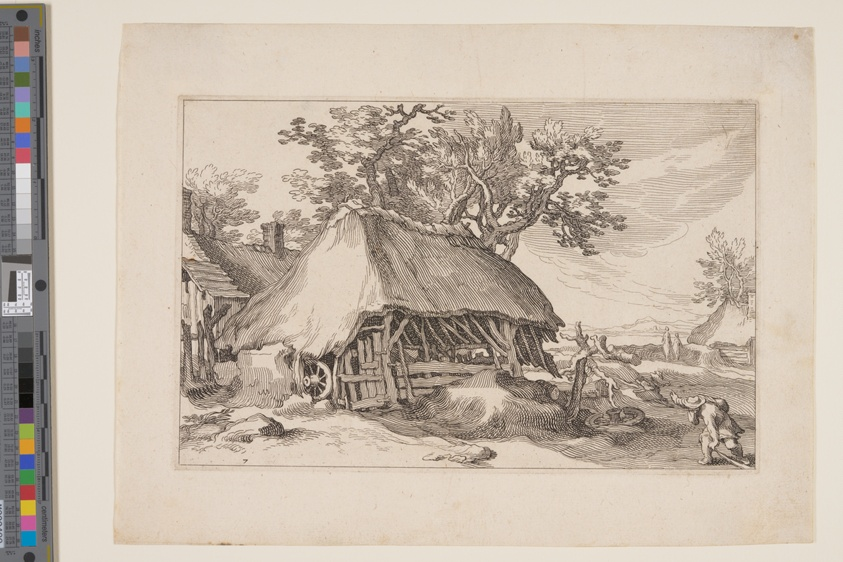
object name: Print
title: Plate 7, from Landscapes with Farmhouses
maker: Boëtius Adamsz. Bolswert (Flemish, 1580–1633); after Abraham Bloemaert (Dutch, 1566–1651)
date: 1614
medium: Etching on ivory laid paper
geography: Flanders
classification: print; paper; prints and drawing; etching